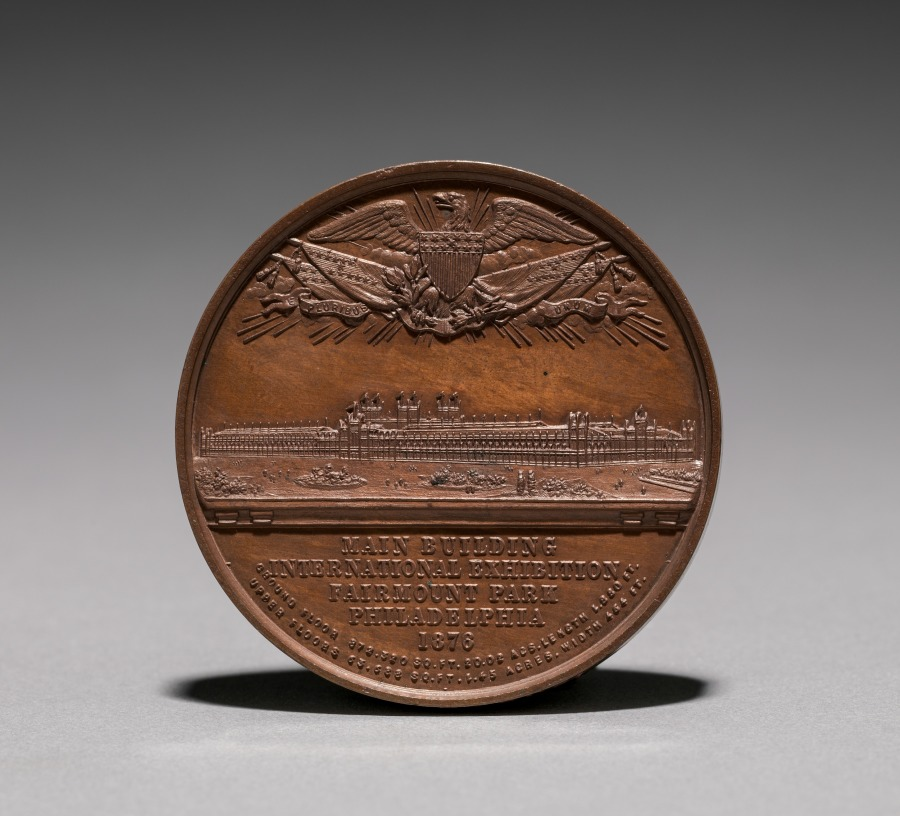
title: Medal: Commemorating the Centennial International Exhibition, 1876 (reverse)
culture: America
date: 1876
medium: bronze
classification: Metalwork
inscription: Main buildings International Exhibition Fairmont Park, Philadelphia 1876.